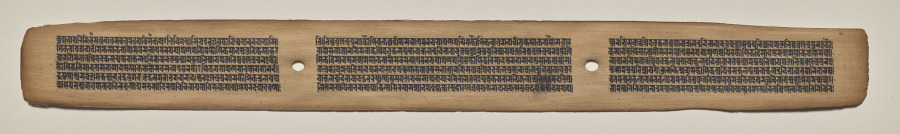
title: Text, Folio 38 (recto), from a Manuscript of the Perfection of Wisdom in Eight Thousand Lines (Ashtasahasrika Prajnaparamita-sutra)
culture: Eastern India, Bihar, Vikramashila Monastery. Painting: Nepal, Kathmandu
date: Sunday, September 14, 1119 (year 239 of the Newar Samvat in the month of Ashvina)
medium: gum tempera and ink on palm leaves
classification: Painting